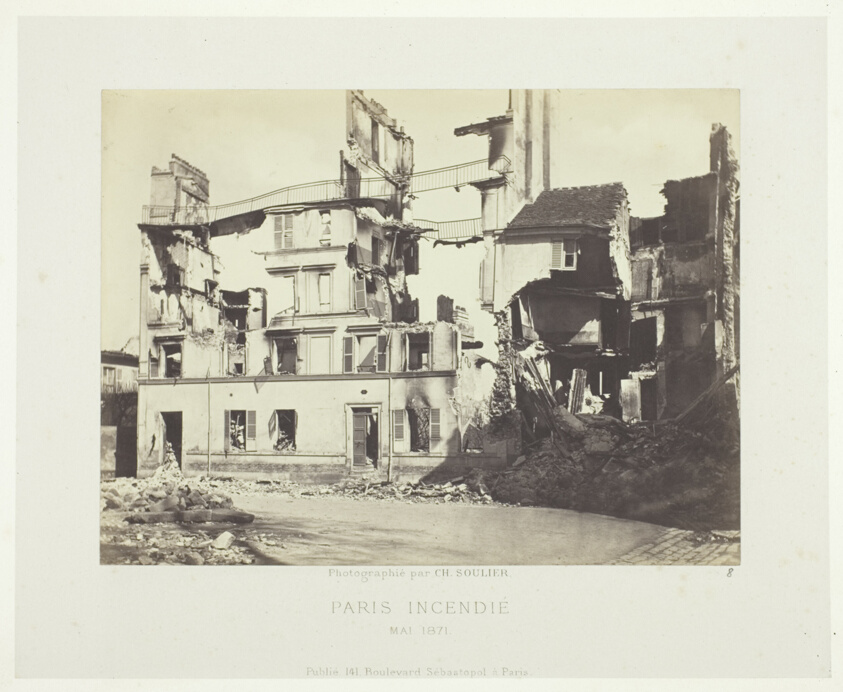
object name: Photograph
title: Paris Fire (Ruins of Houses, Rue de l'Hôpital [Saint-Cloud]), from the series "Paris Incendié"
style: 19th century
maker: Charles Soulier (French, 1840–1875)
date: May, 1871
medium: Albumen print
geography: France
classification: gelatin silver (developing-out-paper) pr; photographic process; photography; photograph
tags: Collected by Hugh Edwards, Paris